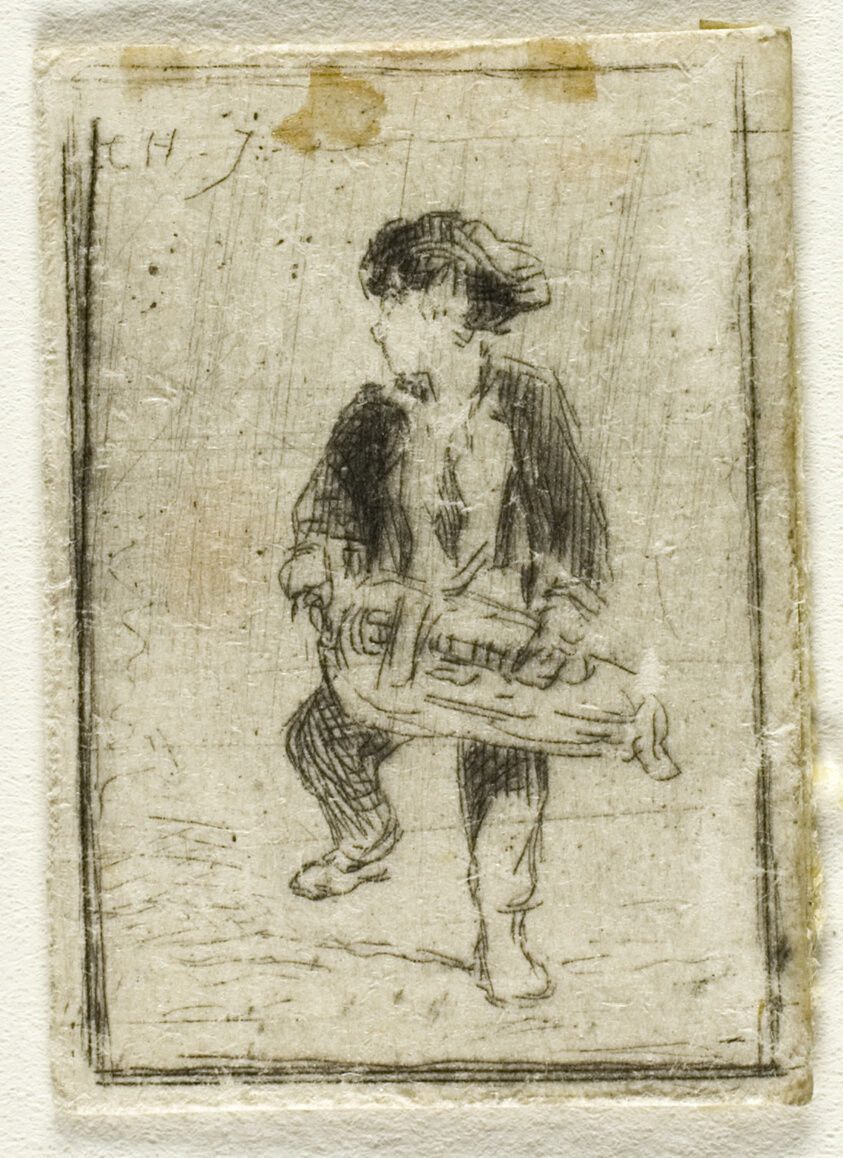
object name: Print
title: Hurdy-Gurdy Player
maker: Charles Émile Jacque (French, 1813-1894)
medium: Drypoint on ivory wove paper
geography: France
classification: drypoint; print; prints and drawing